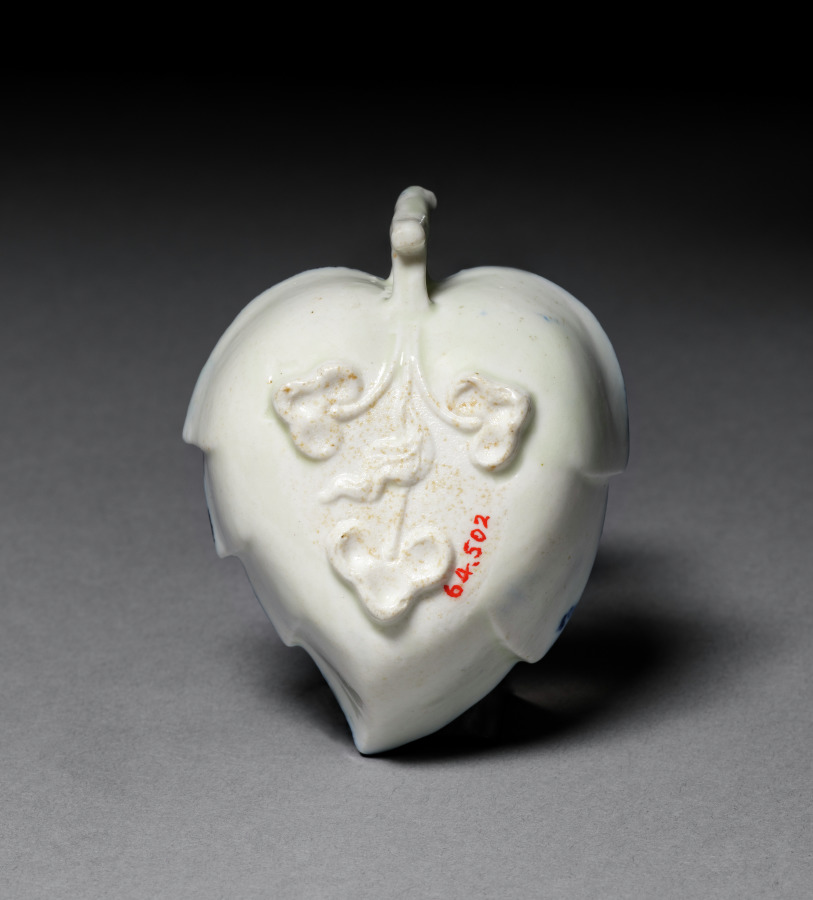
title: Leaf Dish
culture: France, 18th century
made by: Arras Porcelain Factory (French)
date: c. 1780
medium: soft-paste porcelain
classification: Ceramic